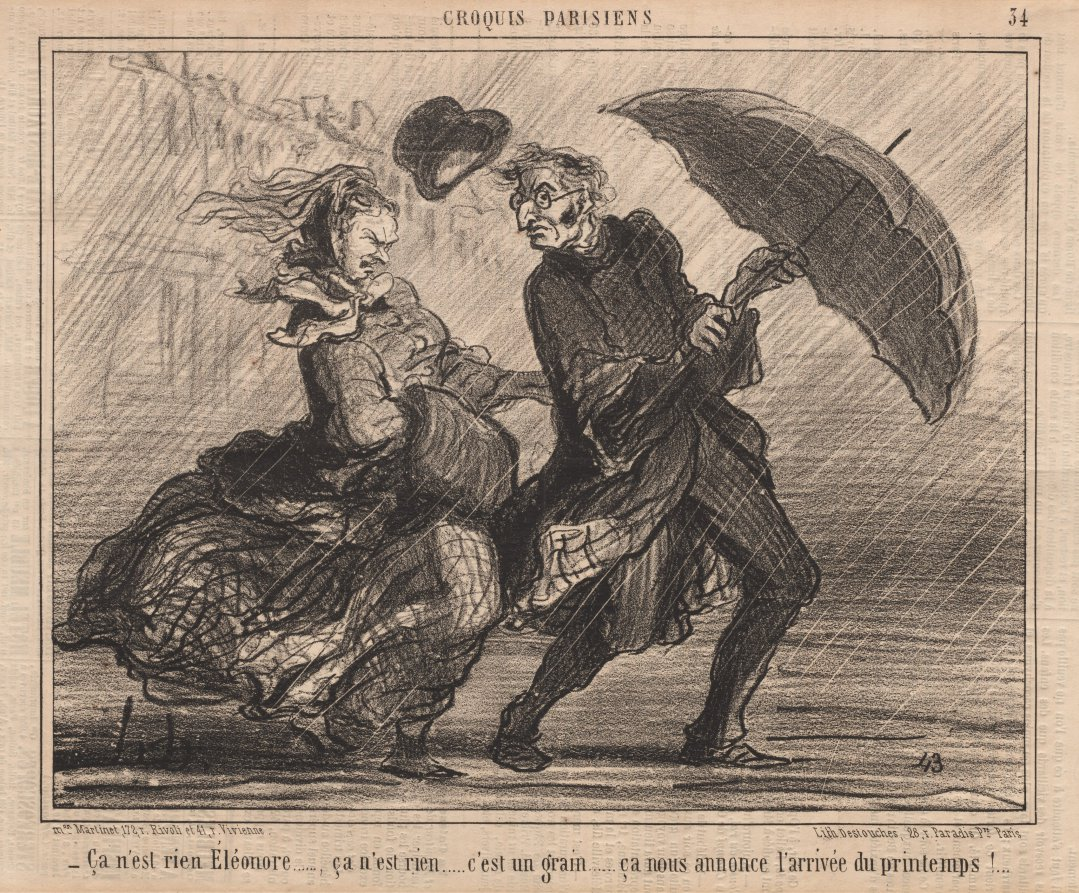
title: It's nothing Eleanor...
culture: France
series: Parisian Sketches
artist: Honoré Daumier (French, 1808–1879)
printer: Destouches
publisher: Maison Martinet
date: 1857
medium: lithograph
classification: Print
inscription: Lower margin, printed : Mon Martinet, 172, r. Rivoli et 41, r. Vivienne / Lith: Destauches, 28, r. Paradis Pre. Paris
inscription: Above image, printed: CROQUIS PARISIENS. / 34 ; Below image, printed: Ça n'est rien Eléonore...... , ça n'est rien..... c'est un grain..... ça nous annonce l'arrivée du printemp !...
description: This print was published in Le Charivari (March 6, 1857) as plate 34 from the series Parisian Sketches.